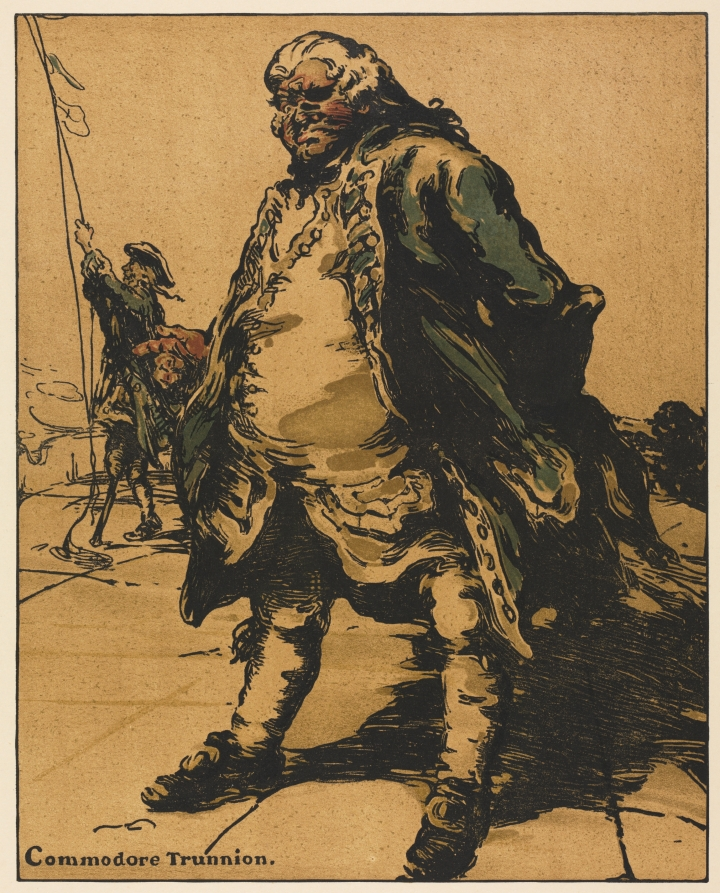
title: Characters of Romance: Commodore Trunnion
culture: England, early 20th century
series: a portfolio of 16 lithographs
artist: William Nicholson (British, 1872–1949)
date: 1900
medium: color lithograph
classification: Print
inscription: Verso, top right, in pencil (not artist's hand): "179496"